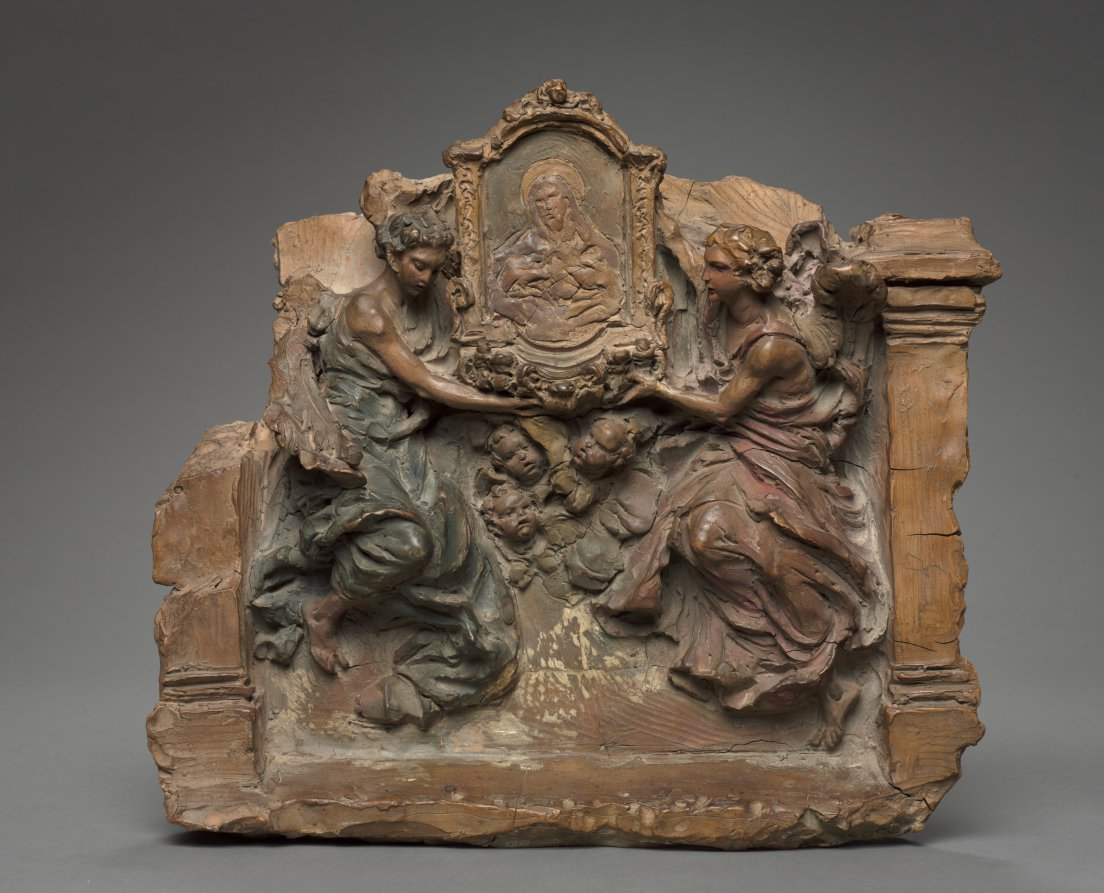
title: Two Angels and Cherubs Bearing an Icon of Christ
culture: Italy, Rome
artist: probably by Paolo Naldini (Italian, 1616–1691)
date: c. 1670–80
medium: terracotta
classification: Sculpture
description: This work is probably a study for a large altarpiece that would have combined several materials, including marble, stucco, and paint. The artist modeled his design in soft clay, which was then hardened by firing; subtle tints suggest the richness of the finished work. The idea of using sculptural figures to support a painted image within an altarpiece was influenced by the work of the Roman sculptor Gian Lorenzo Bernini (1598–1680), with whom Naldini is known to have worked.